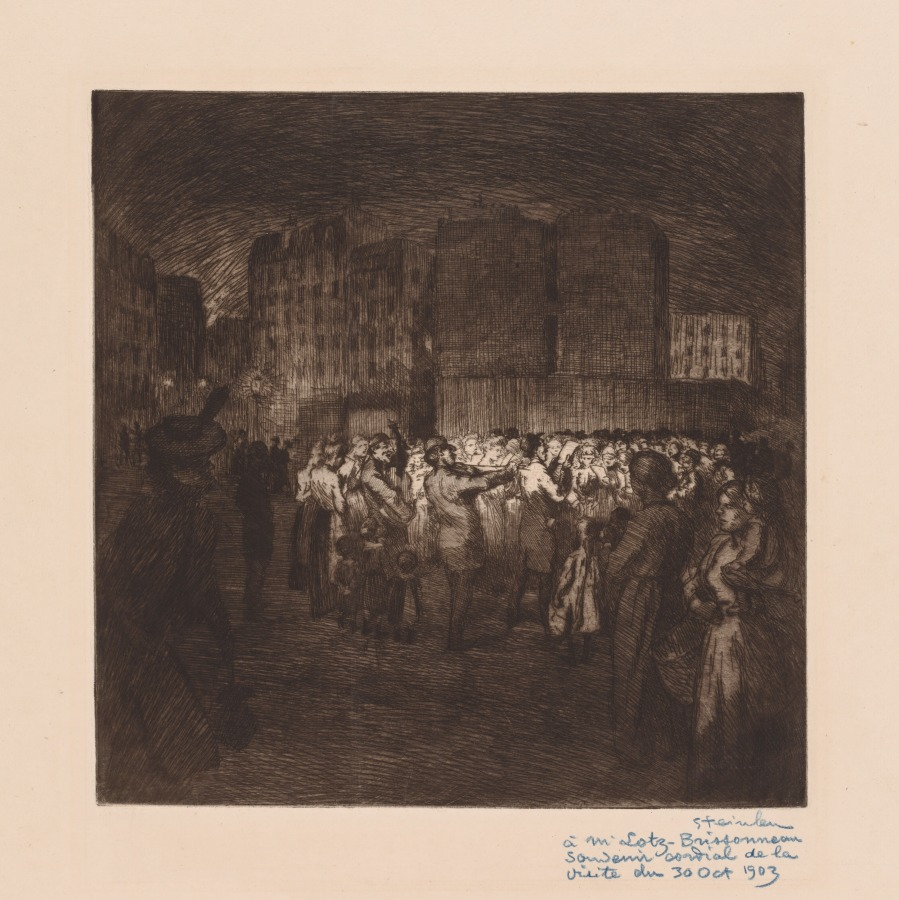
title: Little Street Singers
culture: Switzerland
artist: Théophile Alexandre Steinlen (Swiss, 1859–1923)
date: 1902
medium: etching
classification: Print